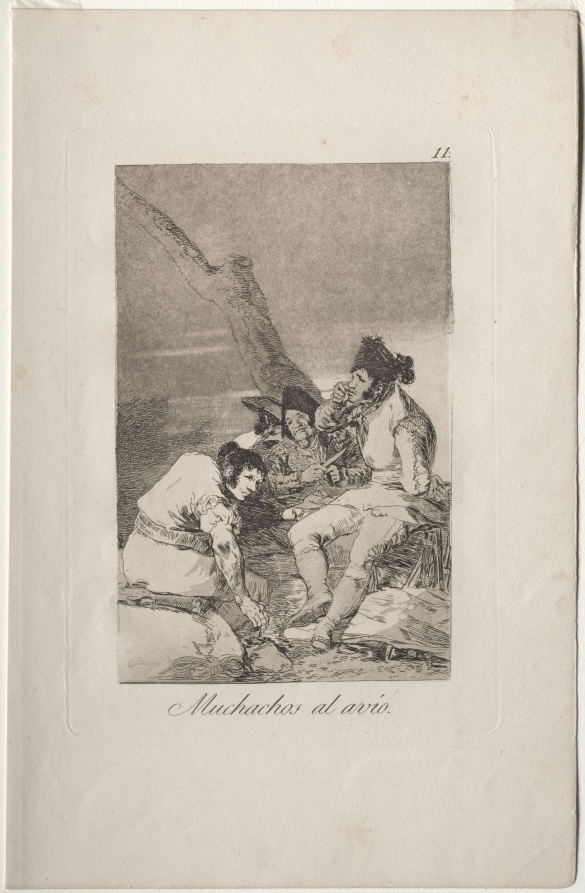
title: Lads Making Ready, Plate 11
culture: Spain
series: Los Caprichos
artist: Francisco de Goya (Spanish, 1746–1828)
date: 1799, printed c. 1855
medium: etching and aquatint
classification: Print